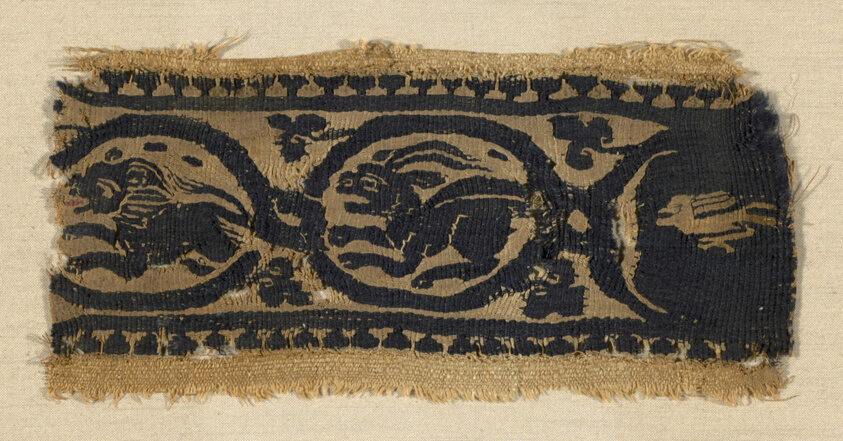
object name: Textile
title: Border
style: greco-roman (egyptian)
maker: Egypt, probably Akhmin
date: Greco–Roman period (30 B.C.– 641 A.D.), 5th century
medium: Wool and linen, slit tapestry weave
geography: Egypt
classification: textile; weaving